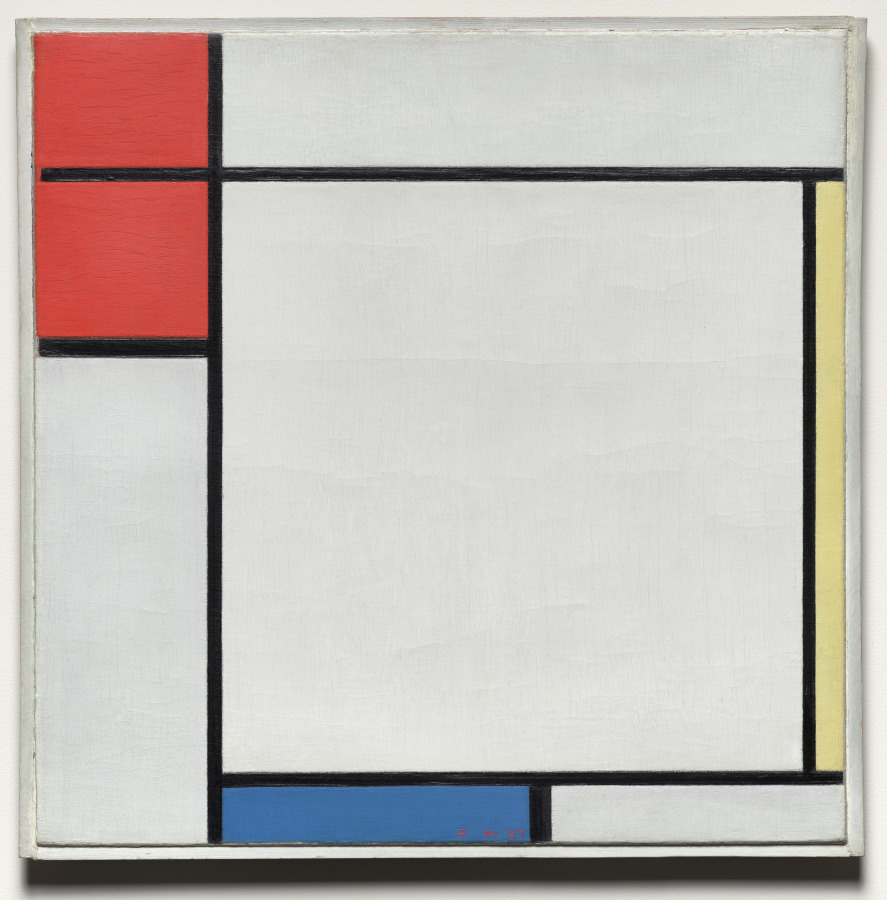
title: Composition with Red, Yellow, and Blue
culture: Netherlands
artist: Piet Mondrian (Dutch, 1872–1944)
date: 1927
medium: oil on canvas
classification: Painting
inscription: signed lower center: P M '27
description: During the 1910s, Piet Mondrian’s art progressed from Cubism to an increasingly abstract style based on the form of a grid. He completely abandoned the representation of natural appearances, limiting himself to horizontal and vertical rectangles and three primary colors (red, yellow, and blue) along with black and white. Intensely intellectual and deeply philosophical, Mondrian believed that following the devastation of World War I, such abstract compositions could contribute to a more harmonious society by communicating in a universal, visual language.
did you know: The small strip of wood around the outside of the canvas, painted the same gray as the canvas surface, is Mondrian’s original frame for the painting.